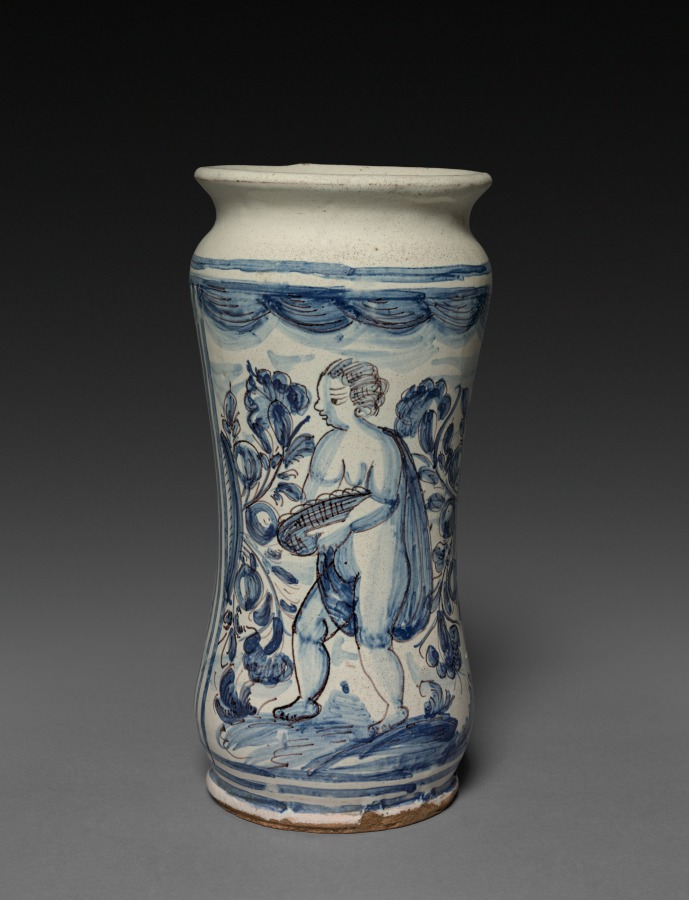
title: Pharmacy Jar (Albarello)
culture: Italy, Liguria, (Albissola ?), 17th century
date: 1650–1675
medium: faience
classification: Ceramic